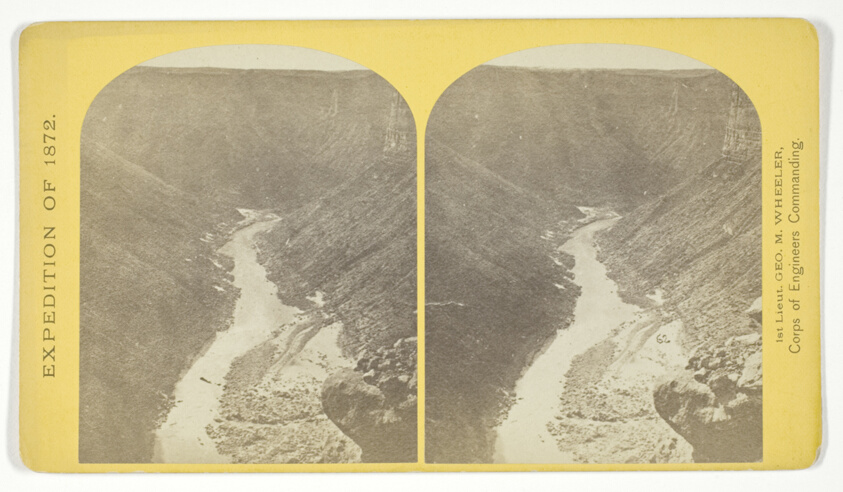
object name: Photograph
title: Marble Cañon, one of the gorges of the Colorado here, 1.200 feet deep. The steep cliff is gray limestone and the slope below a brilliant red sandstone, No. 13 from the series "Geographical Explorations and Surveys West of the 100th Meridian"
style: 19th century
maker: William H. Bell (American, 1830–1910); commissioned by George Wheeler for the War Department, Corps of Engineers, U.S. Army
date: 1872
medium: Albumen print, stereo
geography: United States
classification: stereograph (albumen); photography; photograph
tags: Collected by Hugh Edwards, Geographical Explorations and Surveys